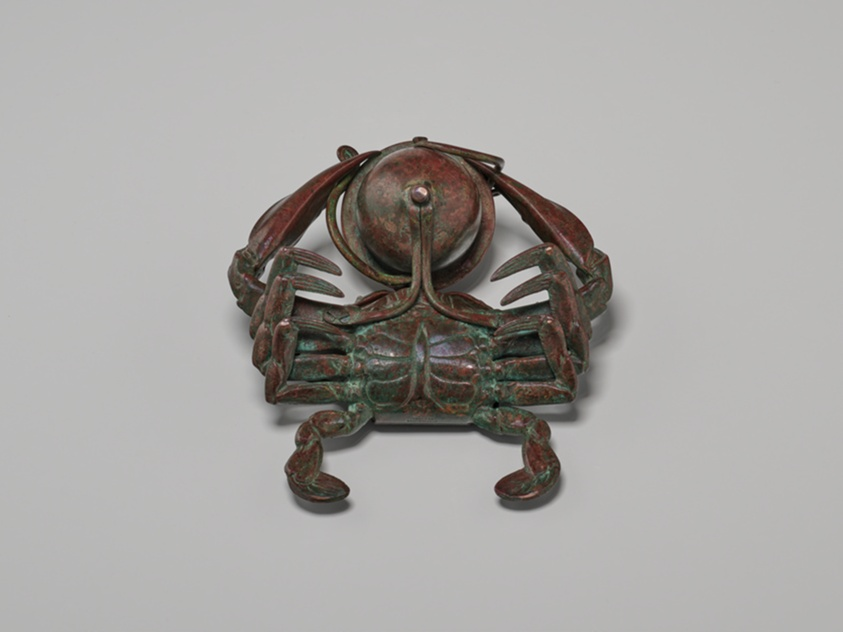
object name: Metalwork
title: “Crab” Inkstand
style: Arts and Crafts Movement, 20th Century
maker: Tiffany Studios (American, 1902–32); Corona, New York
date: c. 1905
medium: Bronze, Favrile glass, and shell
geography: Corona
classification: inkwells; inkwell liners; inkstand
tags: crabs, shells